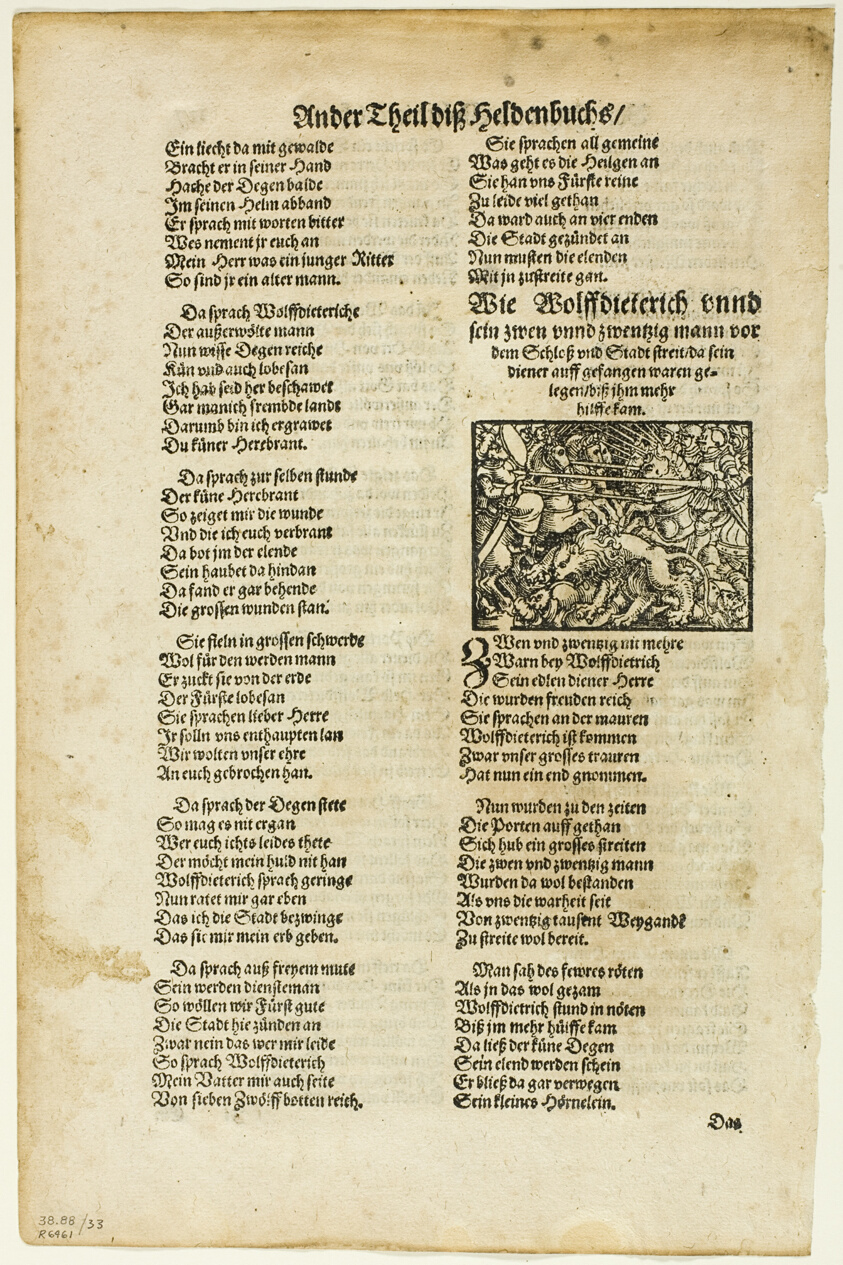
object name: Print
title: Illustration from Das Heldenbuch, plate 33 from Woodcuts from Books of the XVI Century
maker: Unknown Artist (German, 16th century); assembled by Max Geisberg (Swiss, 1875-1943)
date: 1560, assembled into portfolio 1937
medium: Woodcut on paper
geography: Germany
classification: woodcut; print; prints and drawing